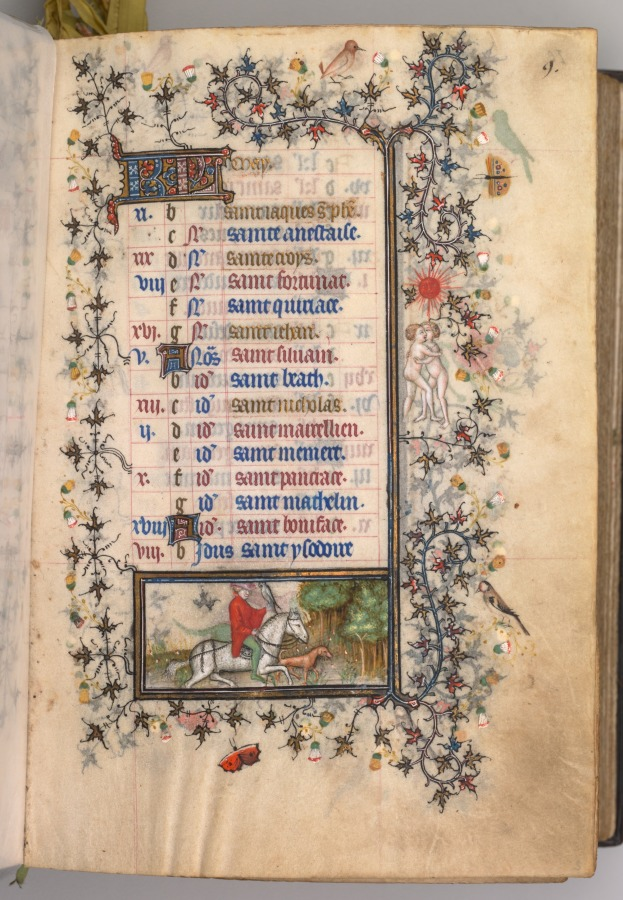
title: Hours of Charles the Noble, King of Navarre (1361-1425): fol. 5r, May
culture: France, Paris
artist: Master of the Brussels Initials and Associates (French)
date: c. 1405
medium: ink, tempera, and gold on vellum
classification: Bound Volume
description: This precious volume was obviously highly prized by its owner, the French-born King of Navarre, who had his coat of arms painted on no less than twenty folios. Rather than directly commissioning this manuscript from a specific workshop, it seems that Charles the Noble acquired his book of hours -- perhaps ready-made for the luxury market -- while on a trip to Paris in 1404-05. A collaborative effort, six painting styles are evidenced within the pages of this codex, those of two Italians, two Frenchmen, and two Netherlanders. The painter who was responsible for the planning and decoration of the book, and who produced seventeen of the large miniatures, was a Bolognese artist known as the Master of the Brussels Initials. His principal assistant, responsible for most of the borders, was a Florentine who signed his name "Zecho" da Firenze on folio 208 verso.